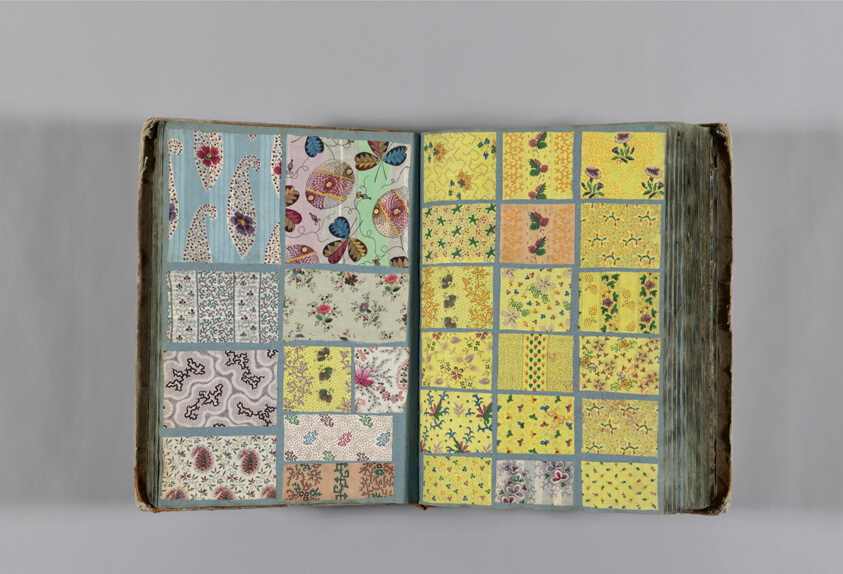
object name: Book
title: Sample book of swatches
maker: Mulhouse, France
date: 19th c.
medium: Sample book of swatches: cotton, plain weave, block printed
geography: France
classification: book; printed; weaving - printed